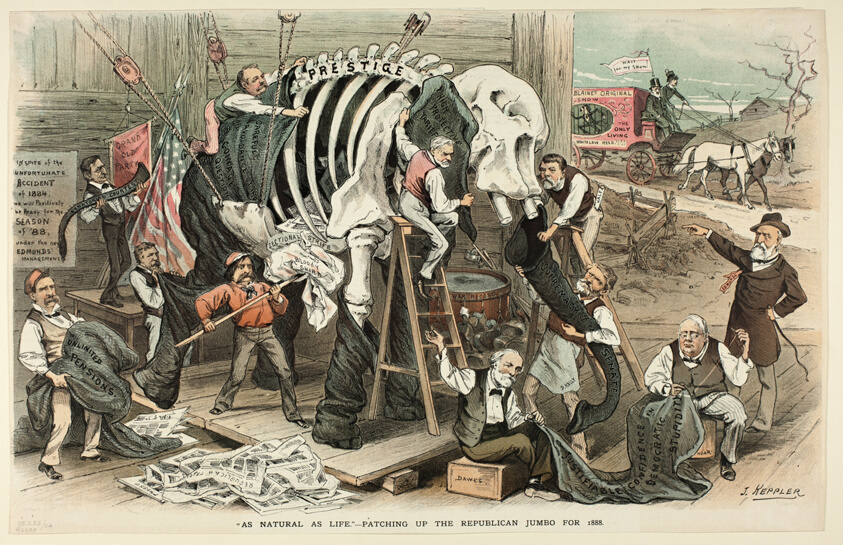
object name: Print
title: As Natural as Life, from Puck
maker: Joseph Keppler (American, 1838-1894)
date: 1888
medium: Color lithograph on newsprint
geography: United States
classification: lithograph; print; prints and drawing